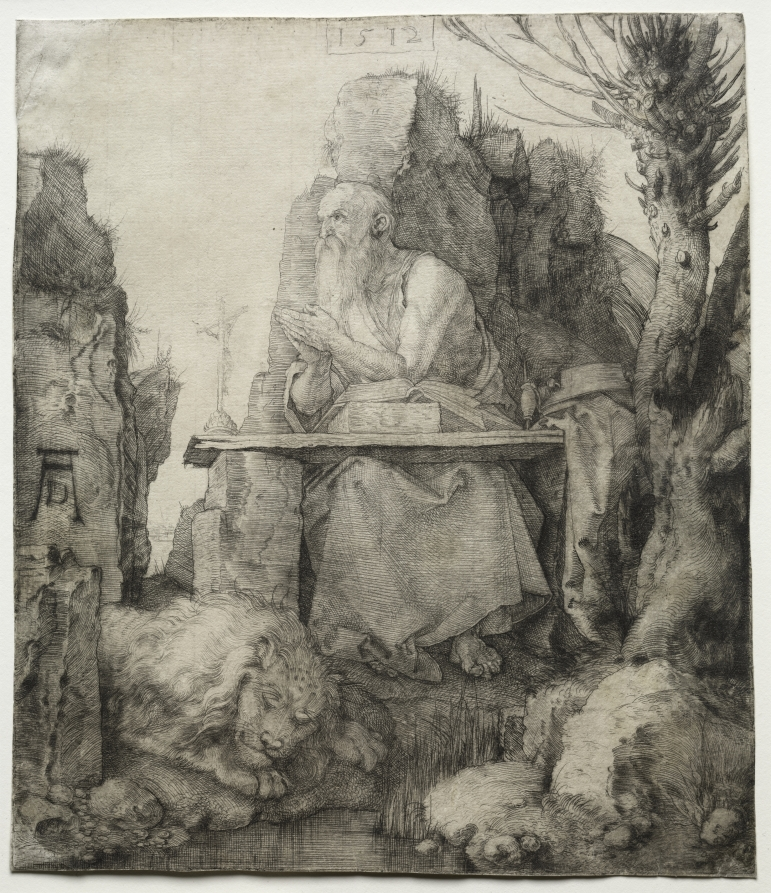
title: St. Jerome Seated near a Pollard Willow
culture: Germany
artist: Albrecht Dürer (German, 1471–1528)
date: 1512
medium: drypoint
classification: Print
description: Of the hundreds of prints Albrecht Dürer made, only three were drypoints, in which a needle scratched directly into a copperplate creates velvety, fuzzy lines. In this image of Saint Jerome, Dürer exploited these qualities of drypoint to manifest the natural, spiritual realm of the saint’s hermitage in the wilderness. Jerome pauses from his studies to pray in a setting that buzzes with life. The saint’s isolation and communion with Christ result in spiritual rebirth, symbolized by the bumpy pollard (trimmed) willow, cut to generate new growth.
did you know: This is one of only three prints Albrecht Dürer made using drypoint, in which a needle is scratched directly into the copperplate.